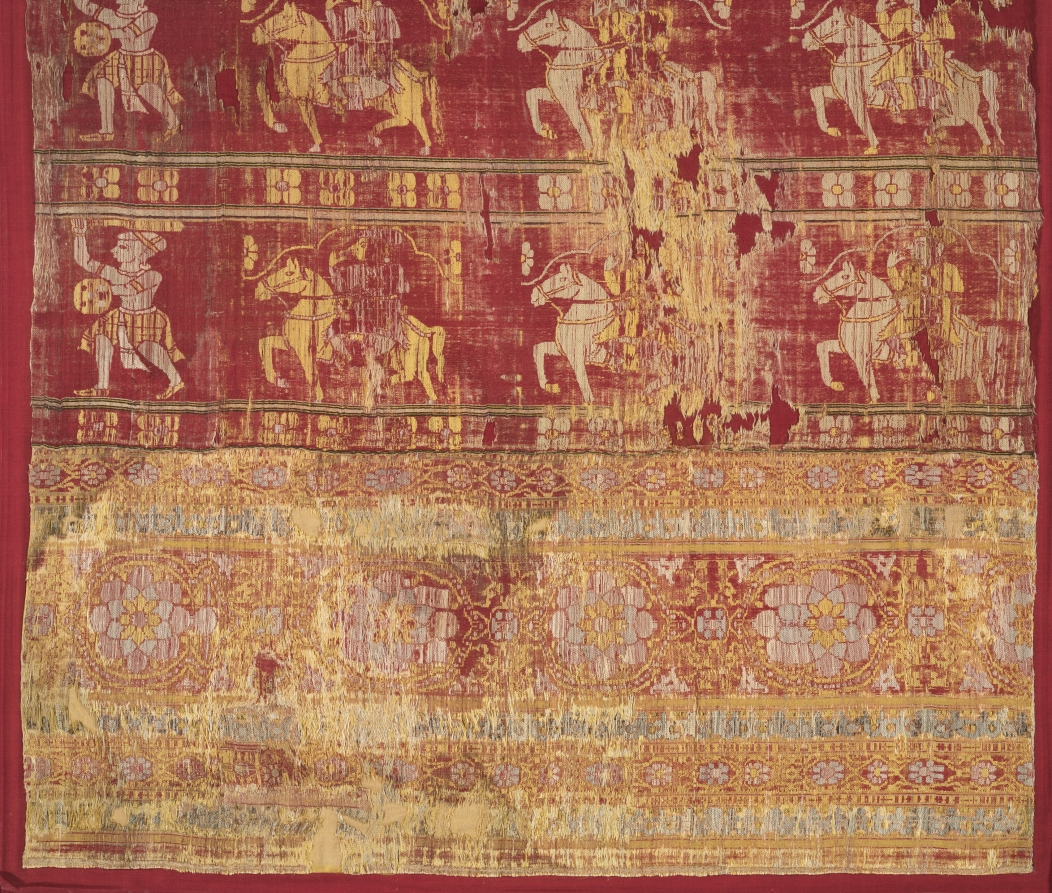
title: Tent Hanging (Part of a Larger Piece)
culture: India, Gujarat, Ahmadabad, 16th-early 17th century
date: 1560–1610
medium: Silk; lampas weave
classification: Textile